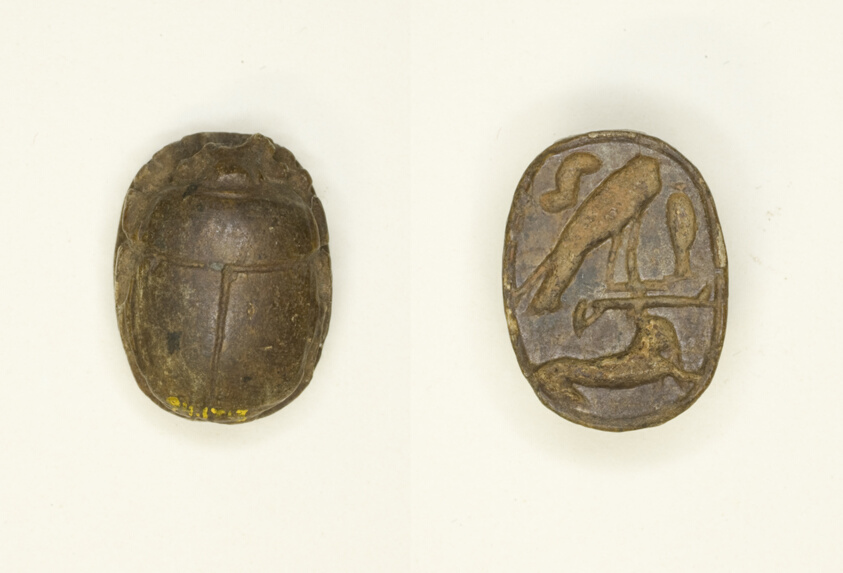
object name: Costume and Accessories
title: Scarab: Falcon with Antelope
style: egyptian, ancient, middle kingdom, new kingdom, second intermediate period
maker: Egyptian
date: Middle Kingdom–New Kingdom, Dynasties 12–18 (about 2055–1295 BCE)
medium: Steatite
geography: Egypt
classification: scarab; ancient art; costume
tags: Hieroglyphs, animals, falcons, insects, serpents, sphinxes